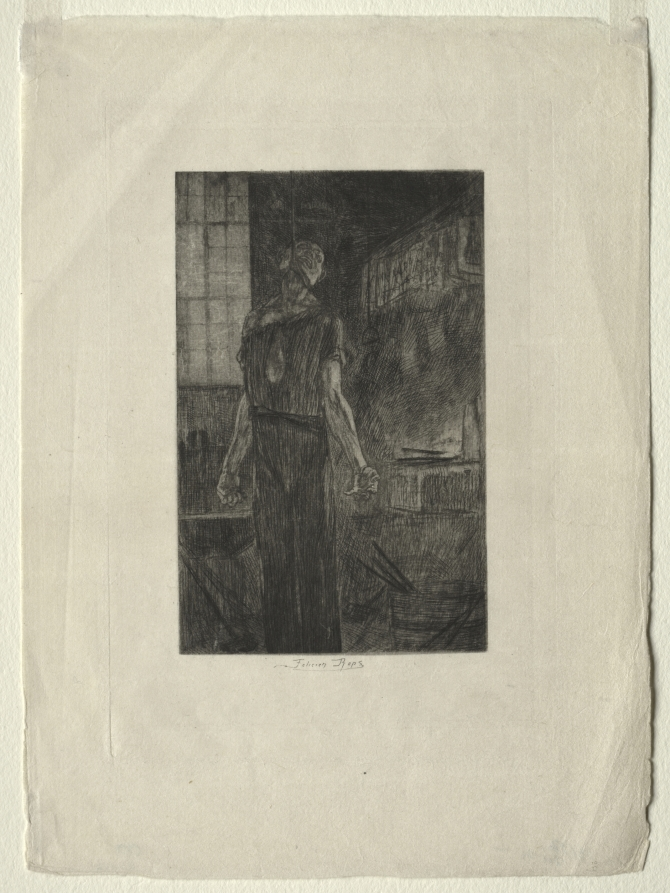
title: The Hanging of Levallois-Perret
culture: Belgium, 19th century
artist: Félicien Rops (Belgian, 1833–1898)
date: c. 1880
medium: etching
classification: Print